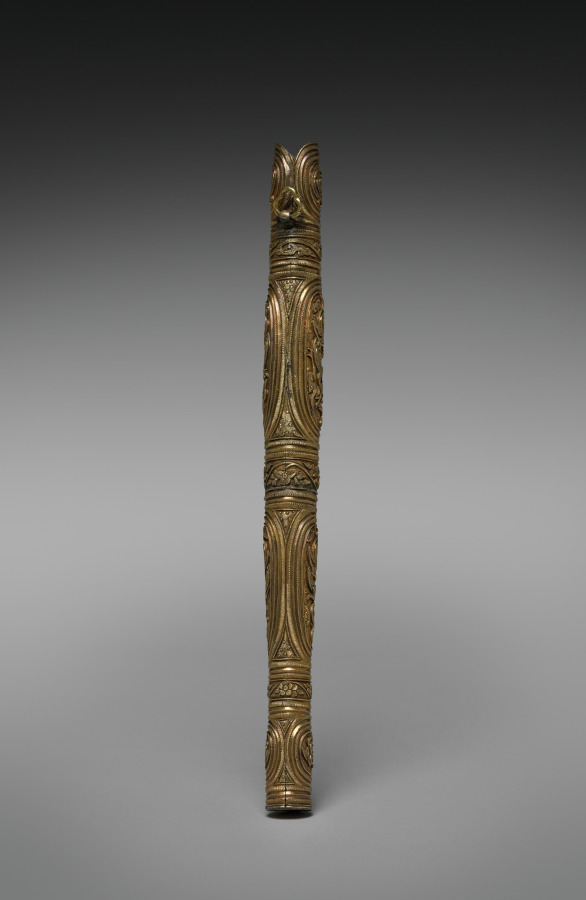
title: Knife Sheath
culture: Korea, Goryeo dynasty (918–1392)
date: 1100s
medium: Gilt silver (body) and brass (trefoil-shaped ring)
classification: Metalwork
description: Made by rolling a flat piece of silver plate, this knife sheath is decorated on each side with oval panels, including two larger middle panels showing an image of rising dragons with ring-punched scales. The circular upper panels bear the image of seated phoenixes. The flat bottom is engraved with a pair of fish, symbolizing harmonious unity. The trefoil-shaped ring attached to the tip of the sheath allows a string to connect it as a pendant to a belt. In medieval Korea, a miniature sheath such as this was considered an important fashion item, especially for elite members of the ruling class.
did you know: This 12th-century silver-gilt knife sheath is meant to be a pendent to a belt as a luxury ornament.